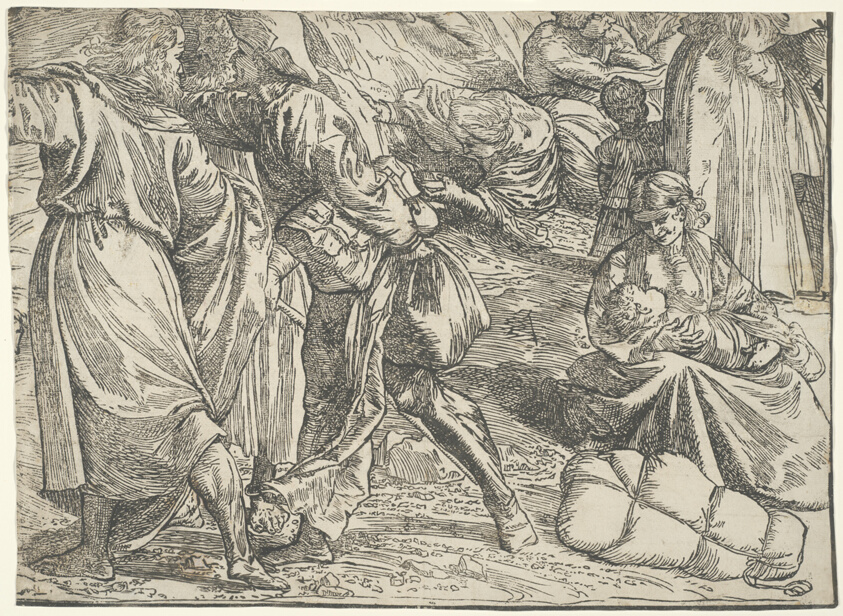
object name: Print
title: The Submersion of Pharaoh's Army in the Red Sea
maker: After Titian (Italian, c. 1488-1576); published by Domenico dalle Greche (Italian, active 1543-1558)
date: c. 1515, printed 1549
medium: Woodcut in black on ivory laid paper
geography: Italy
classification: woodcut; prints and drawing; print